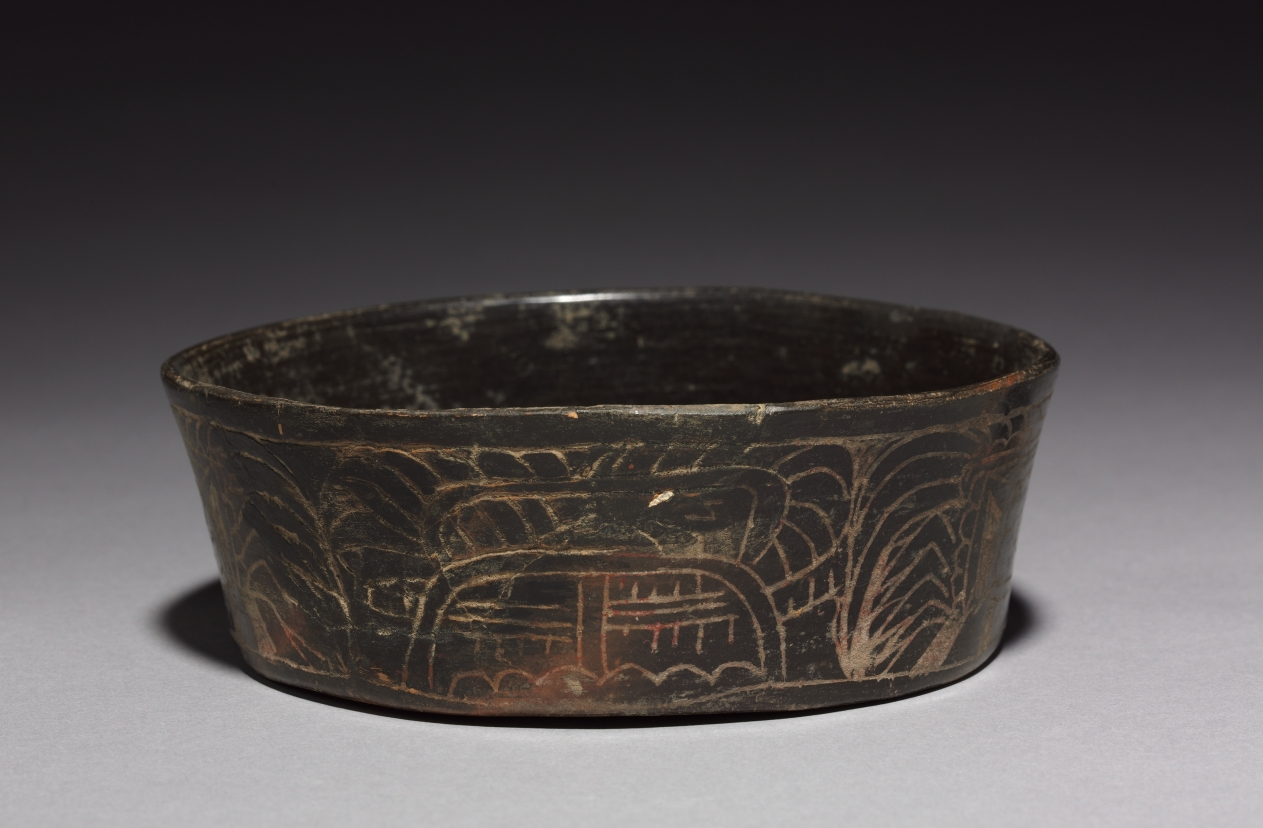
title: Bowl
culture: Central Mexico, Teotihuacán, Classic period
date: 1–550 CE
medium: ceramic, pigment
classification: Stone